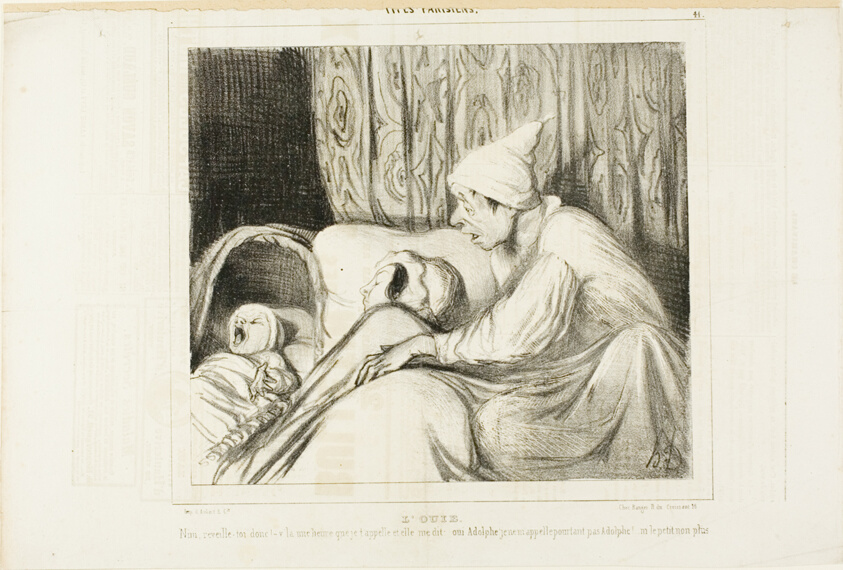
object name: Print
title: Sense of Hearing. “- Wake up Nini!.... I have been calling her for more than an hour, and she always replies: yes Adolphe. But neither the child's name nor mine is Adolphe!,” plate 41 from Types Parisiens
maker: Honoré Victorin Daumier; French, 1808-1879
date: 1839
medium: Lithograph in black on white wove paper, laid down on tan wove paper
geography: France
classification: lithograph; print; prints and drawing